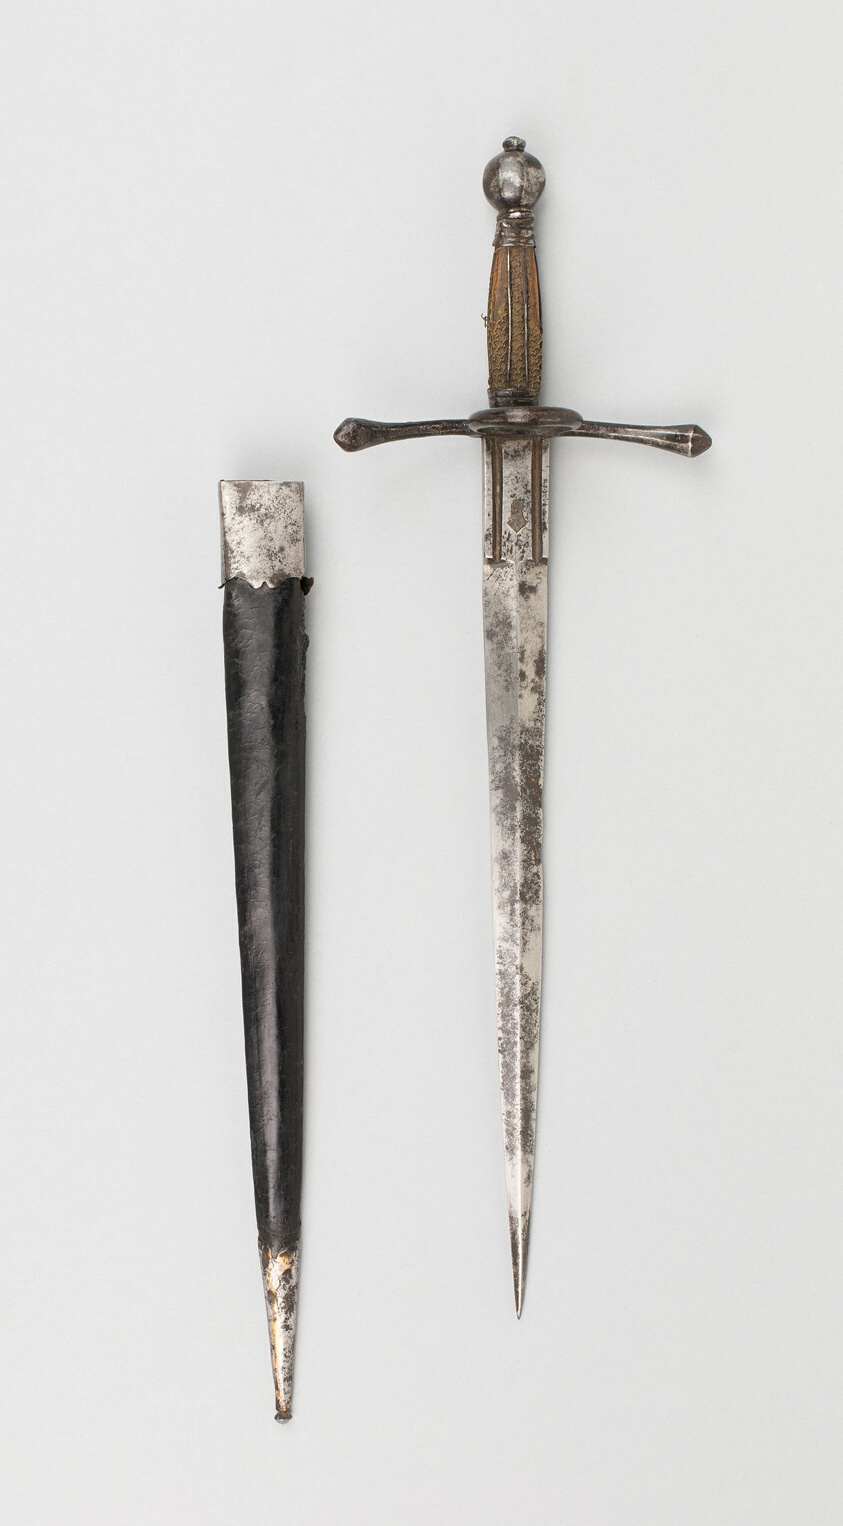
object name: Arms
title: Parrying Dagger with Scabbard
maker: European, Probably Italian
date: About 1600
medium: Steel, wood, copper, iron, and leather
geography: Europe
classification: edged weapon-dagger; arms; arms and armor